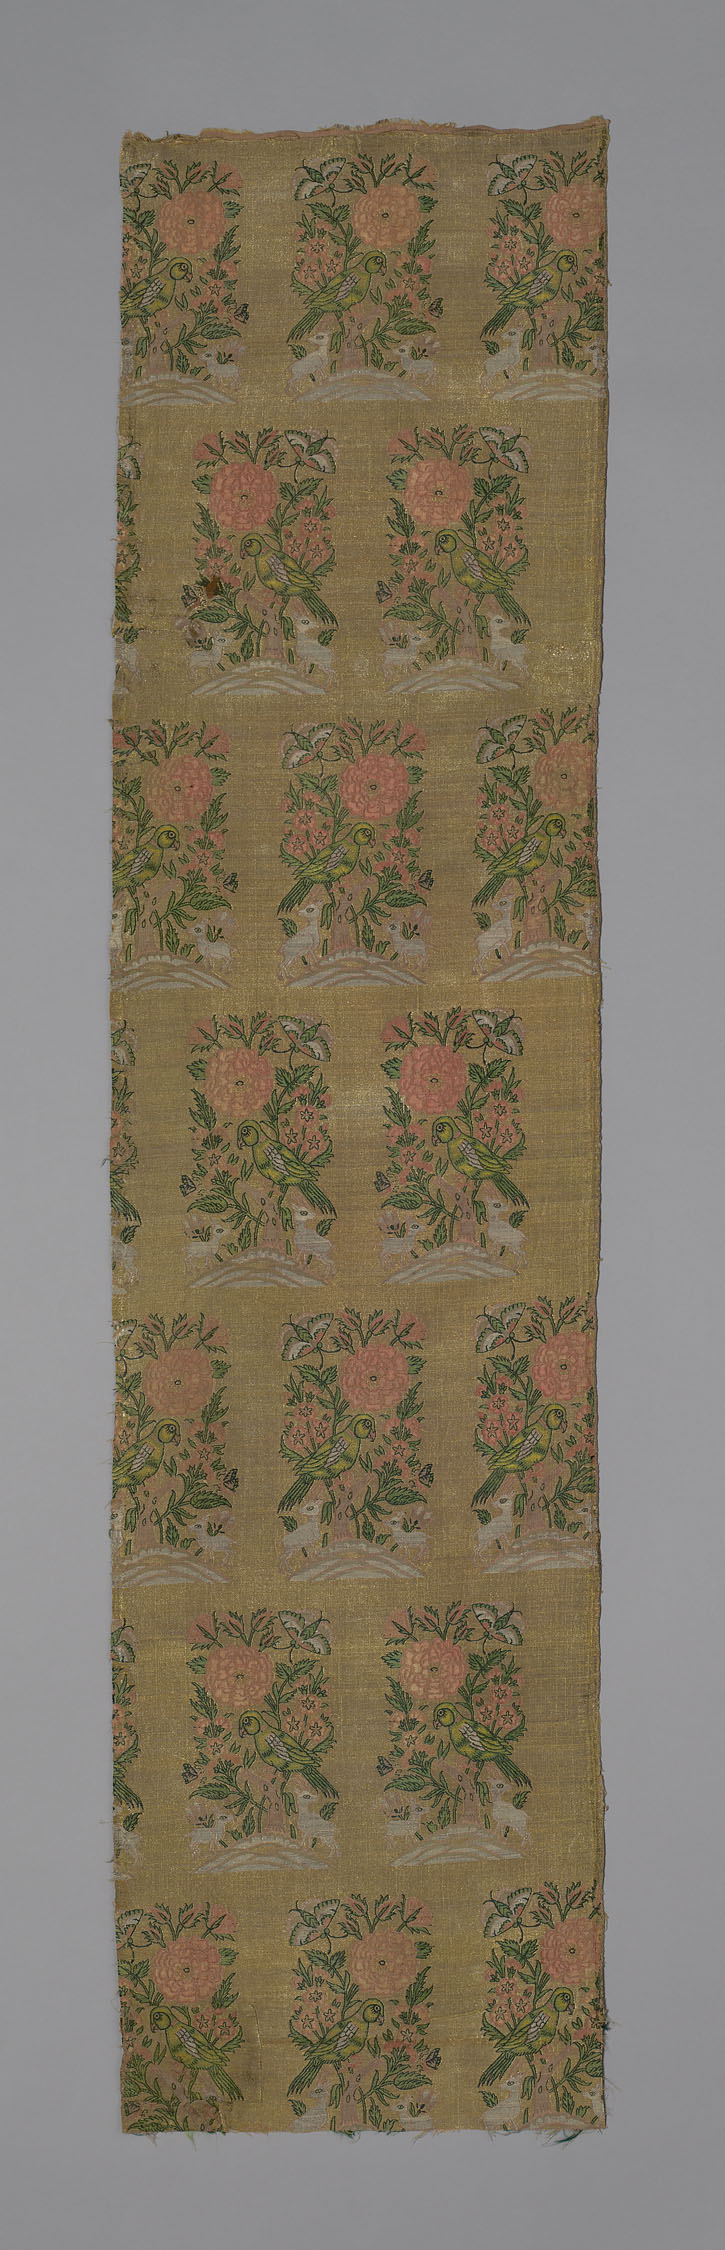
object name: Textile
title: Panel (Dress Fabric)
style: safavid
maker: Iran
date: 1675/1700 Safavid Dynasty (1501–1722)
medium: Silk, gilt-metal-strip-wrapped silk; plain weave with supplementary ground and brocading wefts bound in twill order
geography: Iran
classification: textile; weaving